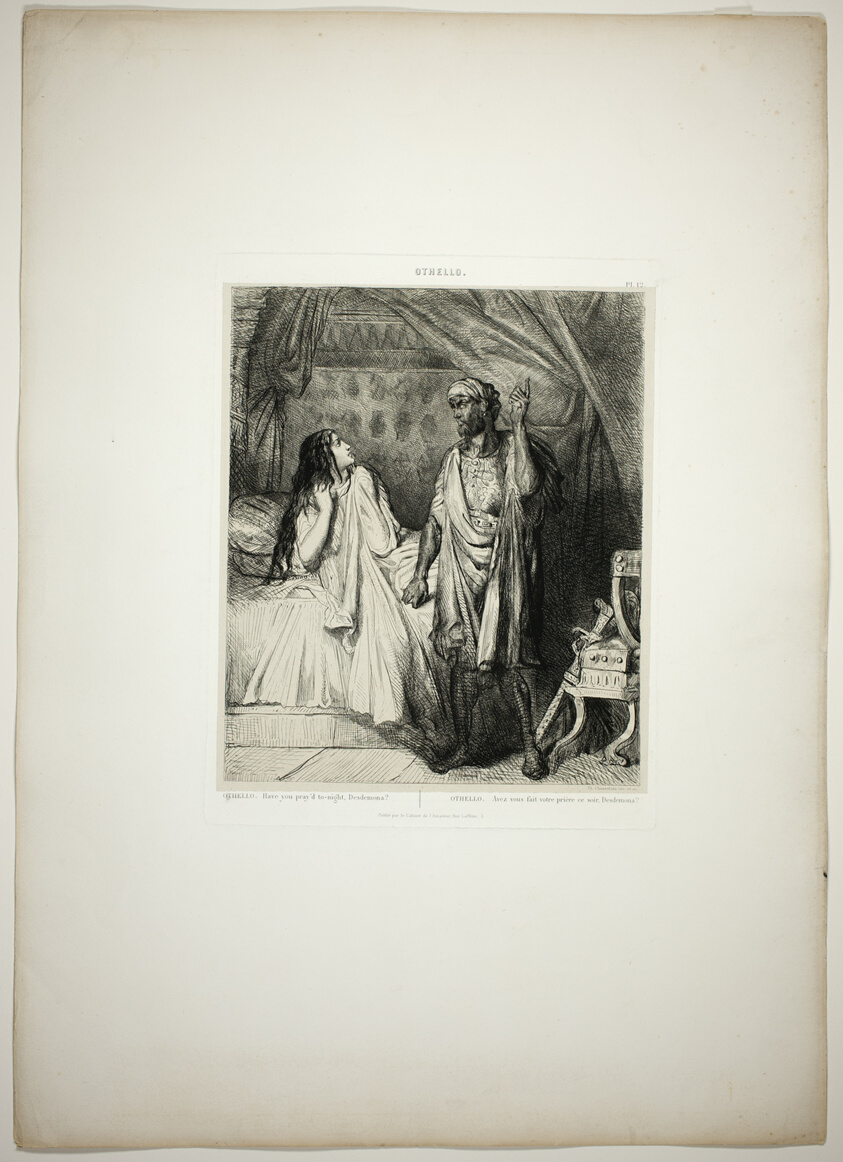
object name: Print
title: Have you pray'd tonight, Desdemona?, plate twelve fom Othello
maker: Théodore Chassériau (French, 1819-1856)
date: 1844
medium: Etching, engraving, roulette, and drypoint on paper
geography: France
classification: etching; print; prints and drawing